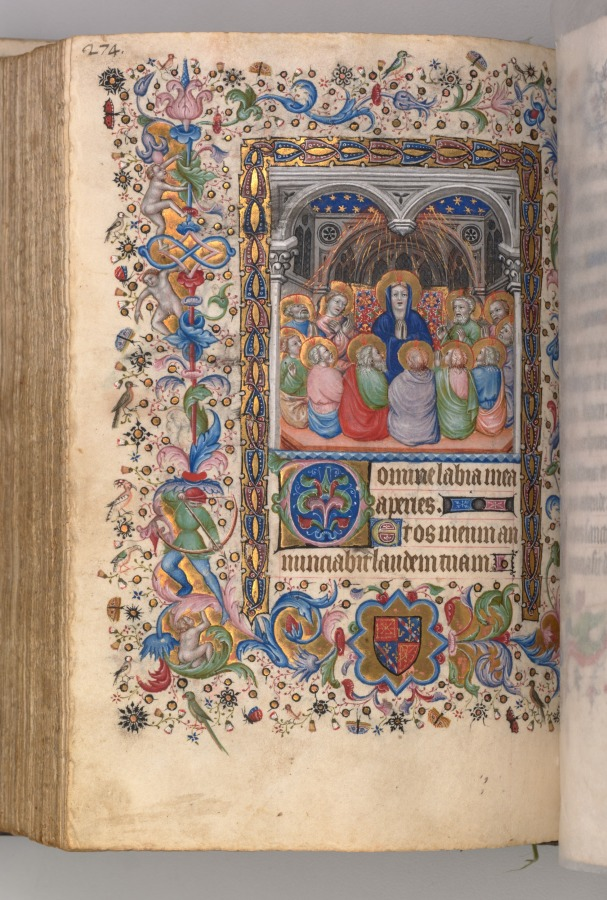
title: Hours of Charles the Noble, King of Navarre (1361-1425): fol. 137v, Pentecost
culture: France, Paris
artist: Master of the Brussels Initials and Associates (French)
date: c. 1405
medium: ink, tempera, and gold on vellum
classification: Bound Volume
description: This precious volume was obviously highly prized by its owner, the French-born King of Navarre, who had his coat of arms painted on no less than twenty folios. Rather than directly commissioning this manuscript from a specific workshop, it seems that Charles the Noble acquired his book of hours -- perhaps ready-made for the luxury market -- while on a trip to Paris in 1404-05. A collaborative effort, six painting styles are evidenced within the pages of this codex, those of two Italians, two Frenchmen, and two Netherlanders. The painter who was responsible for the planning and decoration of the book, and who produced seventeen of the large miniatures, was a Bolognese artist known as the Master of the Brussels Initials. His principal assistant, responsible for most of the borders, was a Florentine who signed his name "Zecho" da Firenze on folio 208 verso.